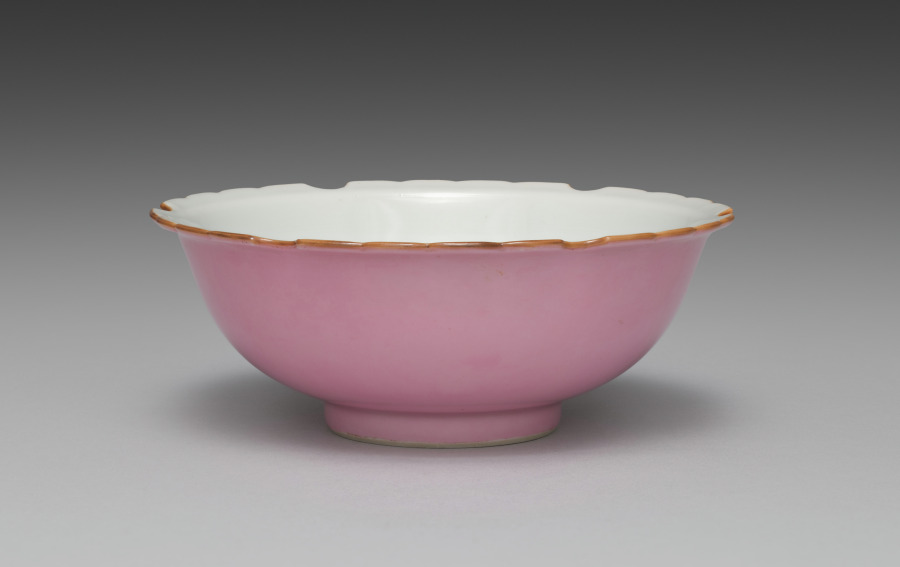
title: Dish from Snow-Flake Side Dishes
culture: Japan, Meiji period (1868–1912)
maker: Seifū Yohei III (Japanese, 1851–1914)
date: 1893–1914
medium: One from a set of six porcelain dishes; porcelain with lobed rims and pink glaze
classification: Ceramic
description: According to the box lid, this set of 6 side dishes, or mukōzuke, are “snow-flower style” (sekkashiki), having mouths shaped like snowflakes. Their mouths, which have 6 lobes and scalloped edges, are traced with brown iron oxide at the rim. The outside of each bowl is glazed with a very bright pink over the basin and foot, and the inside is left white. From directly above, one sees a snowflake-like shape, and from the side, they seem to float above a rosy ground.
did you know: The box for this set of dishes has an inscription on the side noting that they were for a person with the family name Nakamoto.